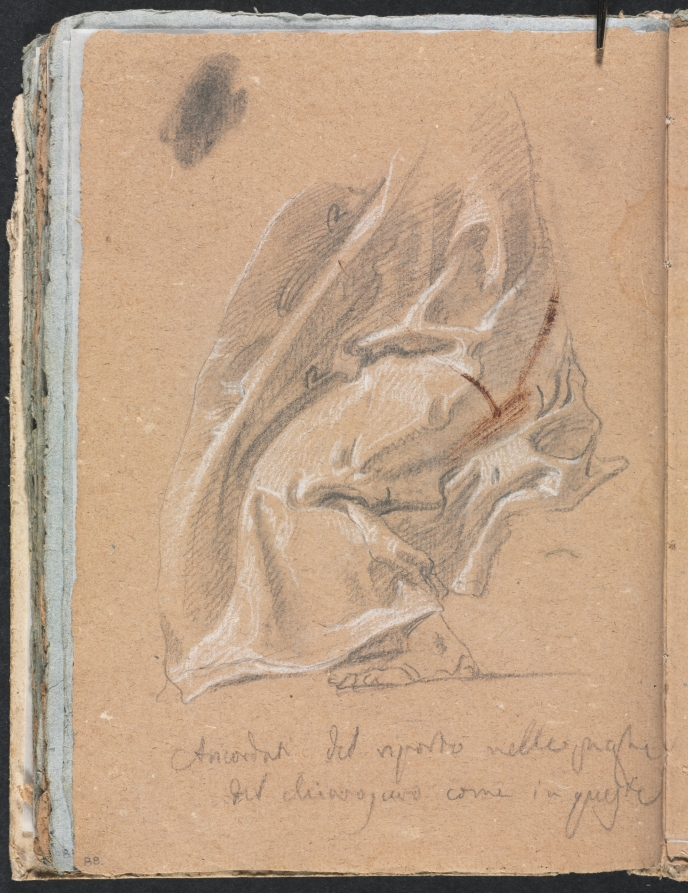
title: Verona Sketchbook: Drapery study with foot and inscription (page 88)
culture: Italy, 18th century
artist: Francesco Lorenzi (Italian, 1723–1787)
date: 1760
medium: black chalk with white heightening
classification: Bound Volume